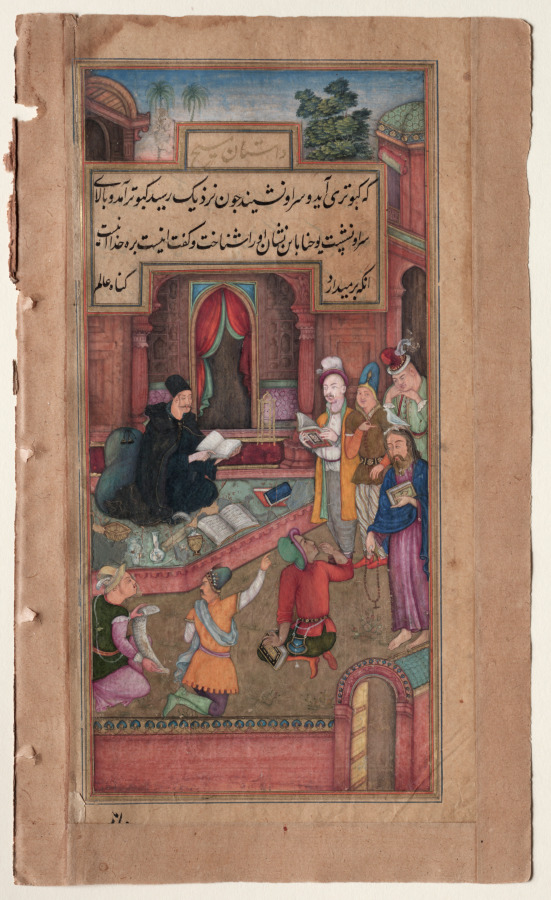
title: John the Baptist recognizes Christ by the appearance of a dove (folio 50 verso), from a Mirror of Holiness (Mir’at al-quds) of Father Jerome Xavier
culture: Mughal India, Allahabad, made for Prince Salim (1569–1627)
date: 1602–4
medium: Gum tempera, ink, and gold on paper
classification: Manuscript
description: Wearing the black robes and cap of a Jesuit priest, John the Baptist sits in a well-appointed Mughal-style courtyard. According to Father Jerome’s text, John recognizes Jesus by the dove who sits on his head. Possibly Father Jerome intended to relate the Gospel account that describes the dove of the Holy Spirit as hovering in the air above his head. The artist’s own reactions to this passage may be reflected in the expressions and gestures of the onlookers, who seem incredulous and bemused at this sign.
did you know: Jesus holds a rosary with a cross even in scenes prior to his crucifixion.